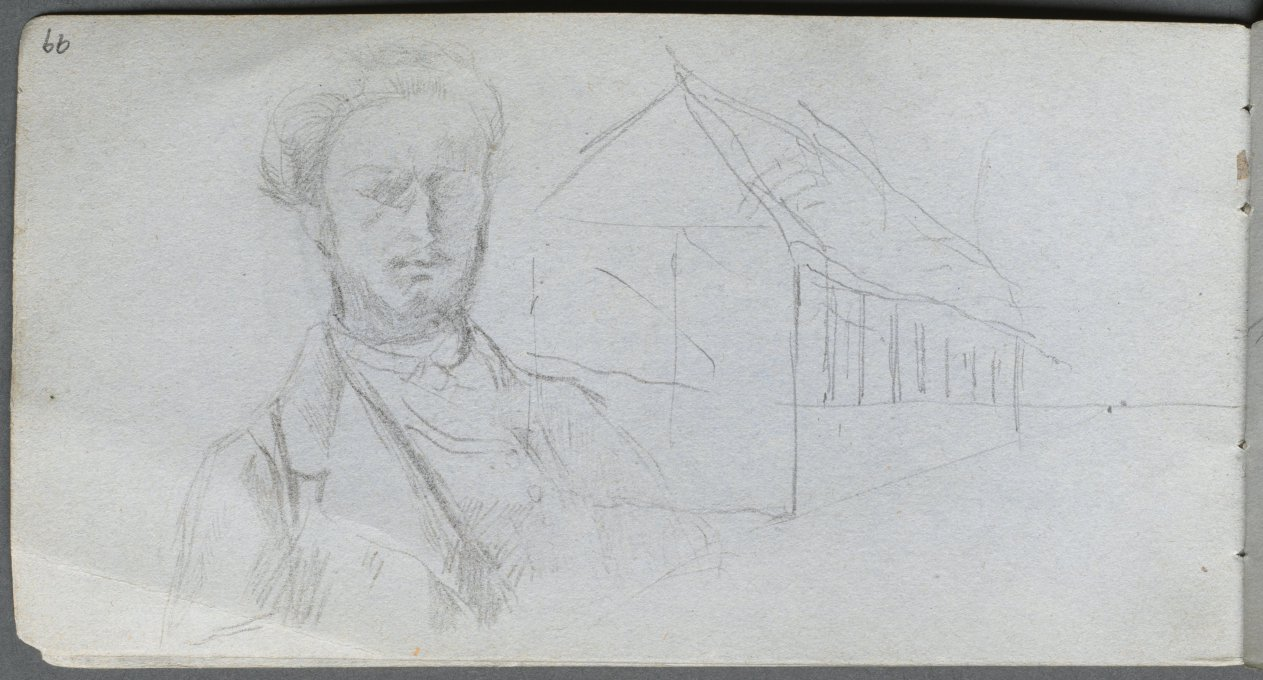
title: Sketchbook, page 99: Study of Figure, Building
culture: France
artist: Ernest Meissonier (French, 1815–1891)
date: c. 1860s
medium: graphite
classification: Bound Volume